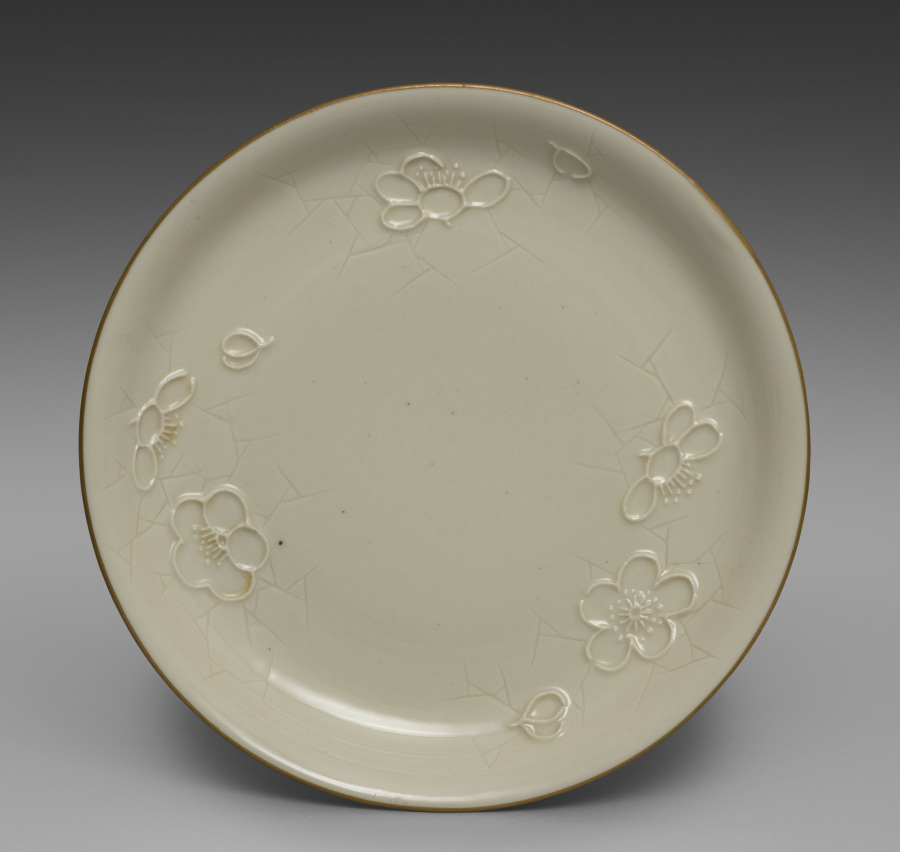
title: Medium-sized Dish from Dining Set with Plum Blossoms and Cracked-Ice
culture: Japan, Meiji period (1868–1912)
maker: Seifū Yohei II (Japanese, 1844–1878)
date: c. 1875–78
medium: Porcelain with molded designs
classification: Ceramic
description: Each item in this set has a delicate low-relief design of flowering plum branches over scattered, intersecting lines meant to resemble the cracked-ice surface of a frozen body of water and is signed on the base in gold pigment. While Yohei II produced many fine works in underglaze blue, like those produced by Kiyomizu Shichibei, he also made works in quite different styles later in his career, from the early 1870 s. In 1873, he was appointed purveyor to the Industrial Center of Kyoto Prefecture, a designation associated with Kyoto’s efforts to reach an international market through the port of Kobe; and from 1875 until his death, he was involved in national-level projects to present Japanese ceramics across the world. It was during this period that Yohei III was apprenticed to Yohei II, and it has been suggested that this set may in fact be an early example of Yohei III’s work, which he signed with his teacher’s name. Decorated with flowers resembling Japanese textile motifs, the set calls to mind the design of Yohei II’s pair of vases with plum blossoms in the Victoria and Albert Museum. Here, the elaborate trees created for a formal public exhibition setting have been translated into the approachable blossoms of the genteel domestic environment. While the designs are consistent across the pieces, each raised flower petal and pistil and each incised line in the ice was done by hand, so the cups, bowls, and dishes are similar yet unique. The bottoms of two boxes once identified the set’s owner, but the information has been deliberately obscured with black ink. However, inscriptions still visible appear to indicate two occasions, once at the end of July 1886 , and once again in June 1916 , when parts of the set were requested from Hokura in Niigata Prefecture. The location corresponds to a neighborhood in the present-day city of Jōetsu. The surname Tsuji 辻 also appears on a paper tag affixed to one of the box cloths. Future research may possibly reveal more about their provenance. A vase by Yohei III in a private collection combines the formal grandeur of the Yohei II vases in the Victoria and Albert Museum with the gentler design of this dining set, placing flowering plum trees against soft, scalloped-edge clouds resembling those in golden screens.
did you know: The dining wares have a creamy white coloration that the four boxes containing them identify as Korean in style.